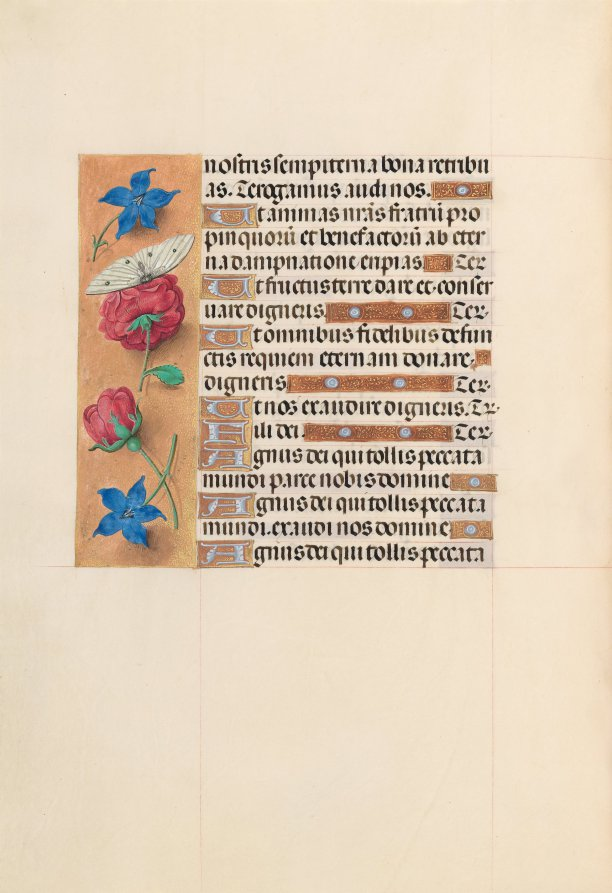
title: Hours of Queen Isabella the Catholic, Queen of Spain: Fol. 214v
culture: Flanders, Ghent and Bruges, late 15th century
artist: Master of the First Prayerbook of Maximillian (Flemish, c. 1444–1519)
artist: and Associates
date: c. 1500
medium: ink, tempera, and gold on vellum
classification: Bound Volume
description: This manuscript was illuminated by a circle of at least five highly organized manuscript painters active in the Flemish cities of Ghent and Bruges. The principal illuminator was Alexander Bening, who painted the majority of the book's miniatures. Manuscripts produced by this circle of artists are renowned for the decoration of their borders, which typically feature a rich variety of realistically-painted flowers, birds, and butterflies. This prayer book, called a book of hours, was intended not for a cleric, but for the private devotions of a lay person-in this case, Isabella the Catholic, Queen of Spain (1451-1504). Isabella's coat of arms embellishes the book's frontispiece. It is unlikely that the book was commissioned by the Queen herself; rather, she probably received it as a diplomatic gift from someone courting her patronage, perhaps Cardinal Francisco Jimenez de Cisneros. A Franciscan friar, Jimenez was dependent upon Isabella for his advancement, first to the post of Queen's confessor in 1492, and then to Archbishop of Toledo in 1495.